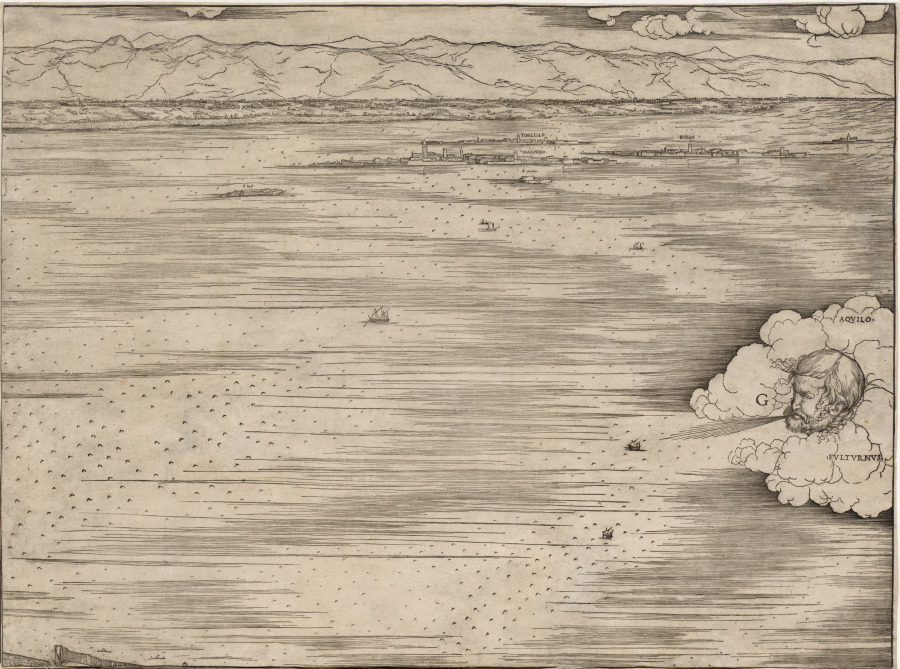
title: View of Venice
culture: Italy, early 16th Century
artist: Jacopo de' Barbari (Italian, c. 1460/70–c. 1516)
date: 1500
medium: woodcut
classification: Print